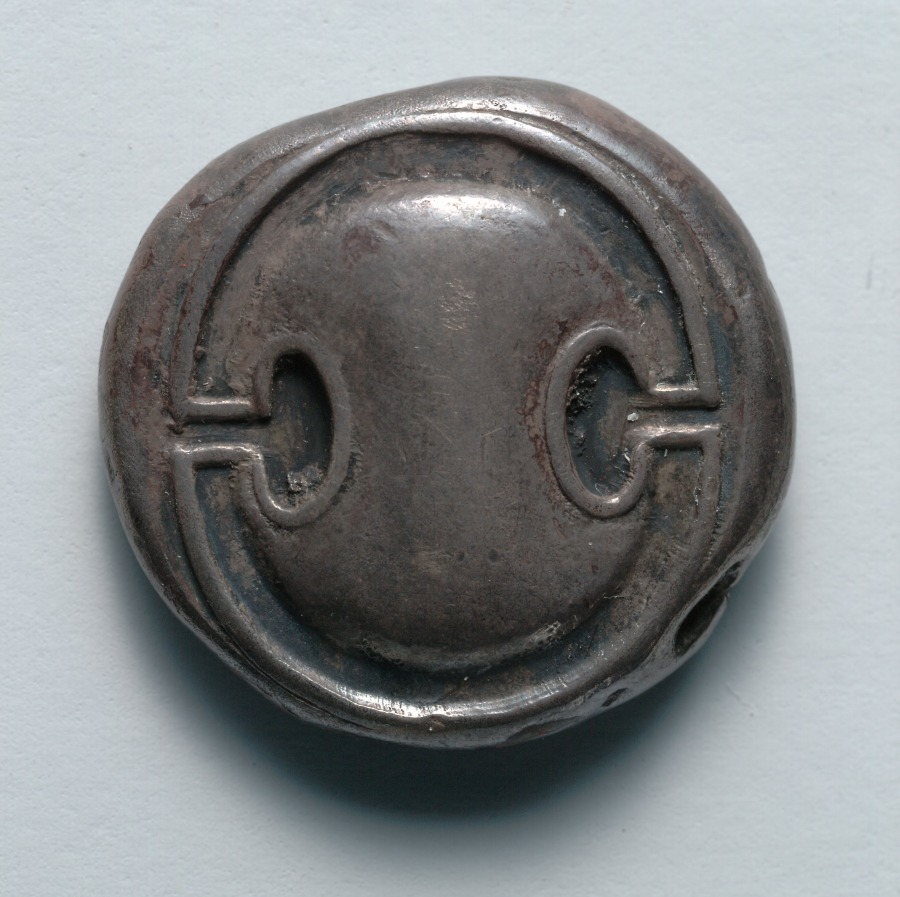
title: Stater: Boeotian Shield (obverse); Volute Krater (reverse)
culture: Greek, minted at Thebes (Boiotia)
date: 379–338 BCE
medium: silver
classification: Coins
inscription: ΑΓ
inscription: ΛΑ